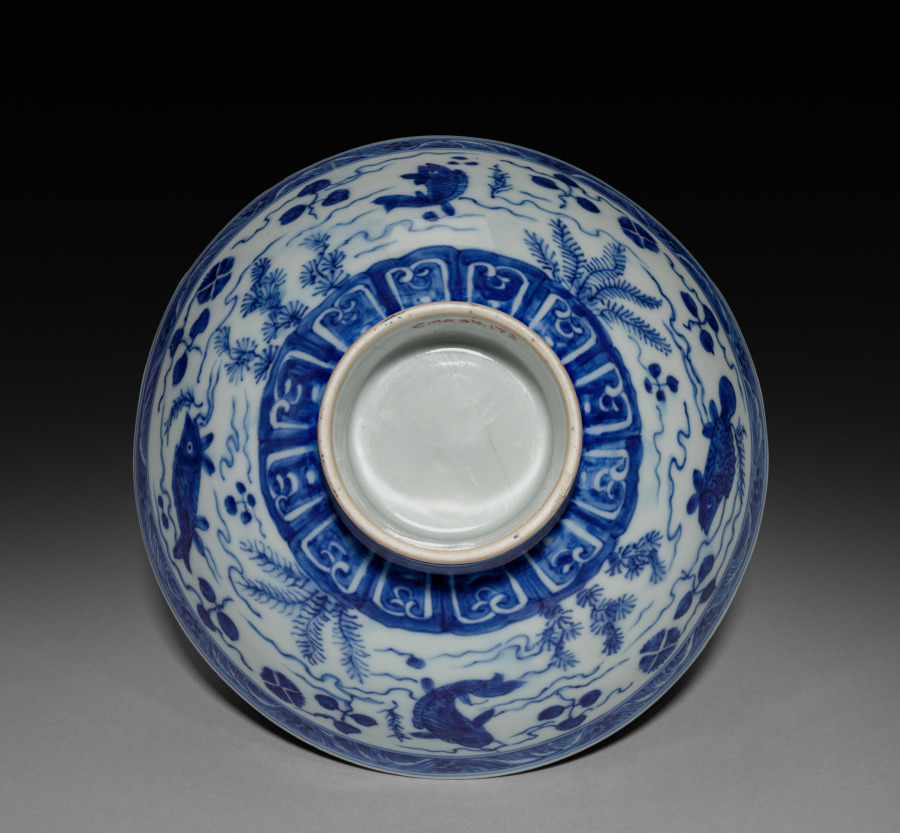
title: Bowl with Fish and Water Plants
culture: China, Jiangxi province, Jingdezhen kilns, Ming dynasty (1368-1644), Jiajing mark and reign (1522-66)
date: 1522–66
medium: porcelain with underglaze blue decoration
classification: Ceramic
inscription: 大明嘉靖年製